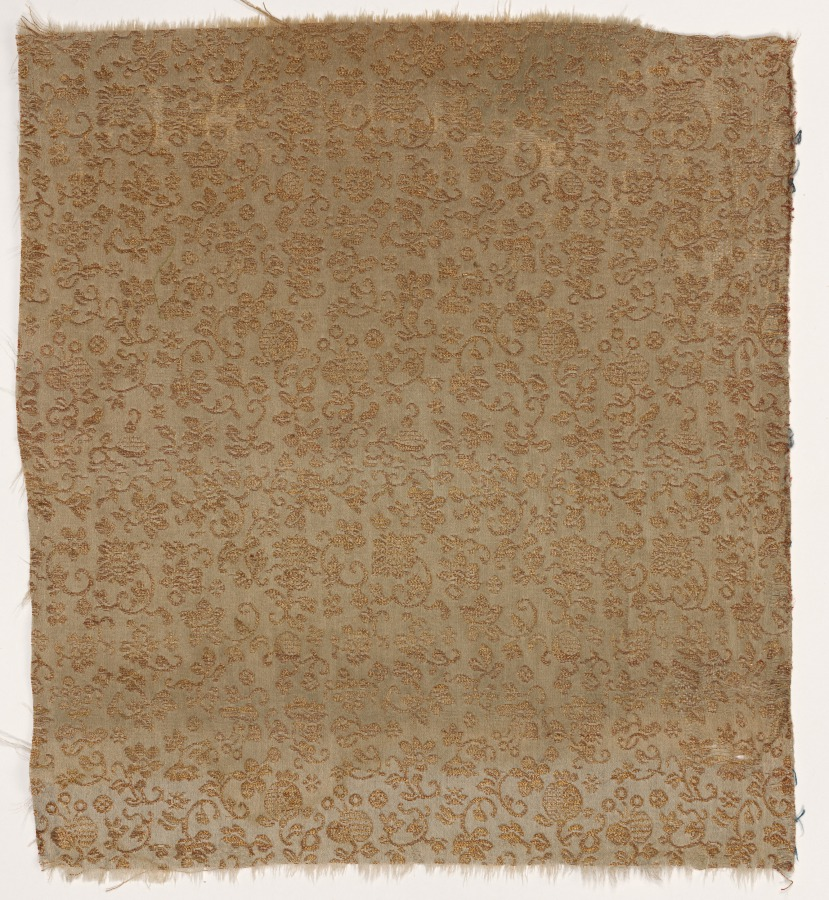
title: Textile Fragment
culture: Japan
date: 1800s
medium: silk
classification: Textile